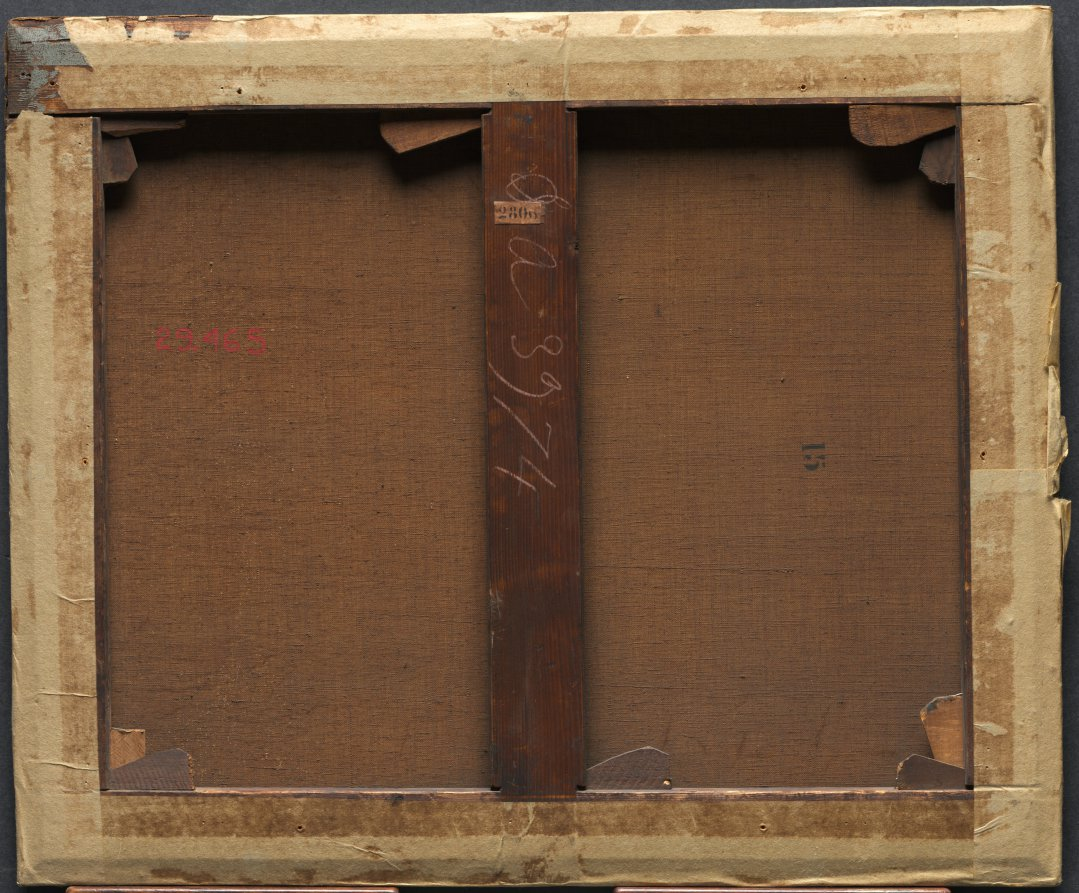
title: The Cliff at Étretat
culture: France, 19th century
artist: imitator of Gustave Courbet (French, 1819–1877)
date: after 1872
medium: oil on fabric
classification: Painting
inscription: Signed lower right: G. Courbet